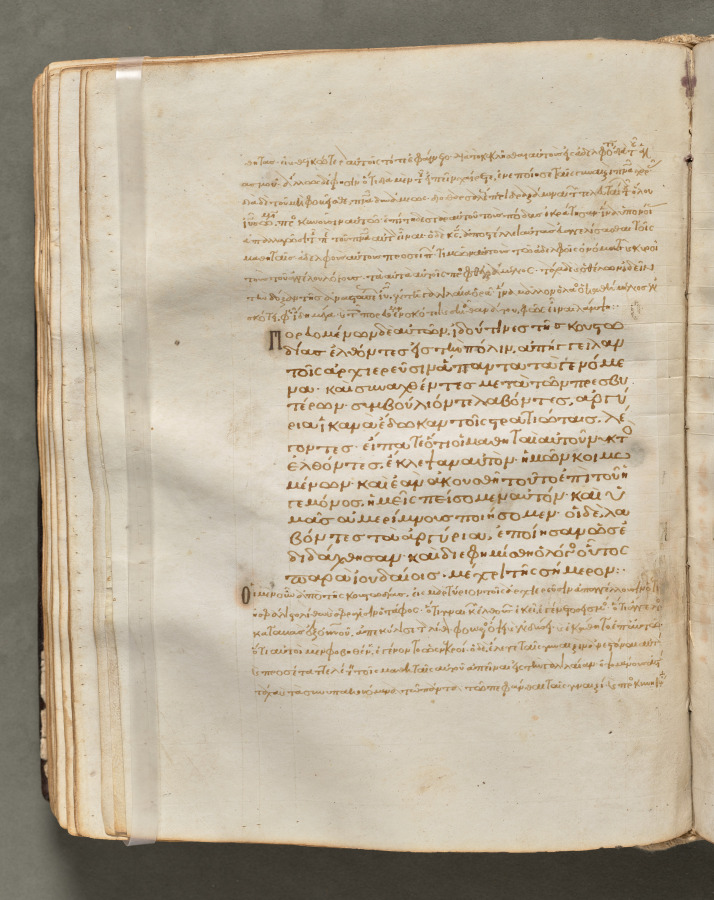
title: Text, folio 129 (verso), from a Gospel Book with Commentaries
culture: Byzantium, Constantinople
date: c. 1000–1100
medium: ink, tempera, and gold on vellum; leather binding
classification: Bound Volume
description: Each of the four gospels in this book opens on a page with brilliantly illuminated borders depicting the author of the text as well as birds-principally peacocks, symbols of the immortality of the soul-and fountains, representing the fountain of life and the salvation of the soul. This volume consists of 428 leaves with texts in Greek. Its level of sophistication suggests that it was probably written and decorated in a monastery in Constantinople.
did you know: Gospel Books were carried in procession through Byzantine churches.